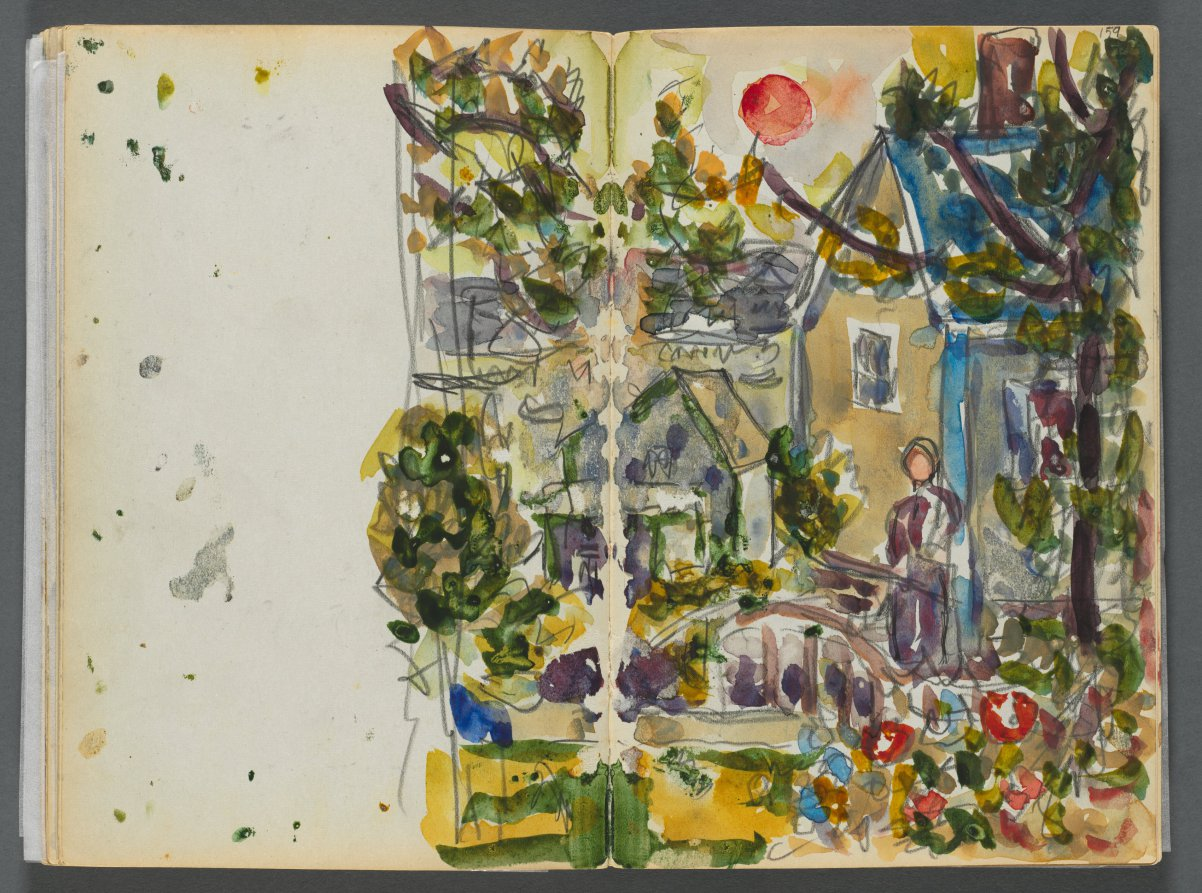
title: Sketchbook- The Granite Shore Hotel, Rockport, page 158 & 159: House and Garden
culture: America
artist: Maurice Prendergast (American, born Newfoundland [now Canada], 1858–1924)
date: 1905–10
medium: graphite and watercolor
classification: Bound Volume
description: This sketchbook contains 72 pages of pencil drawings and 9 watercolors of Cape Ann. On the inside of the cover Prendergast wrote the address of the Granite Shore Hotel in Rockport, Massachusetts.